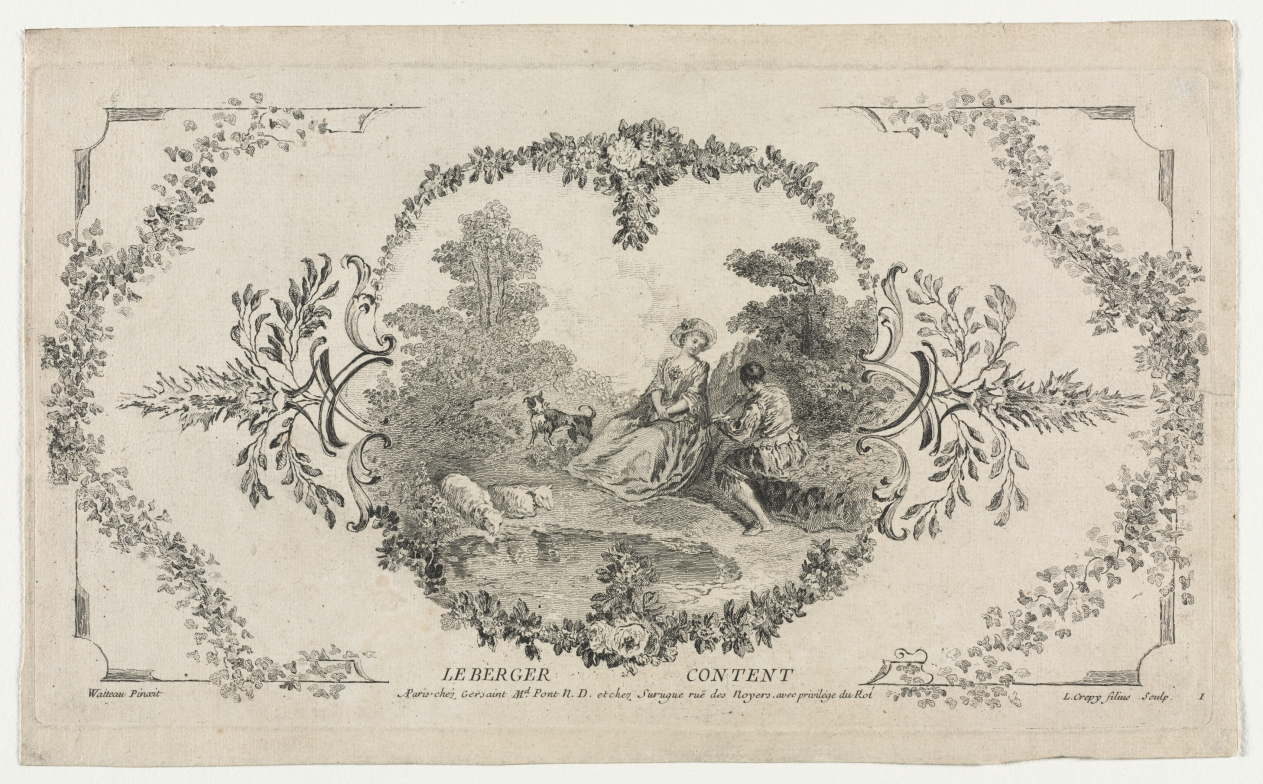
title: The Happy Shepherd, Arabesque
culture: France, 18th century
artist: Louis Crépy (French)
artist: after Jean-Antoine Watteau (French, 1684–1721)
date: c. 1729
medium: engraving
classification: Print